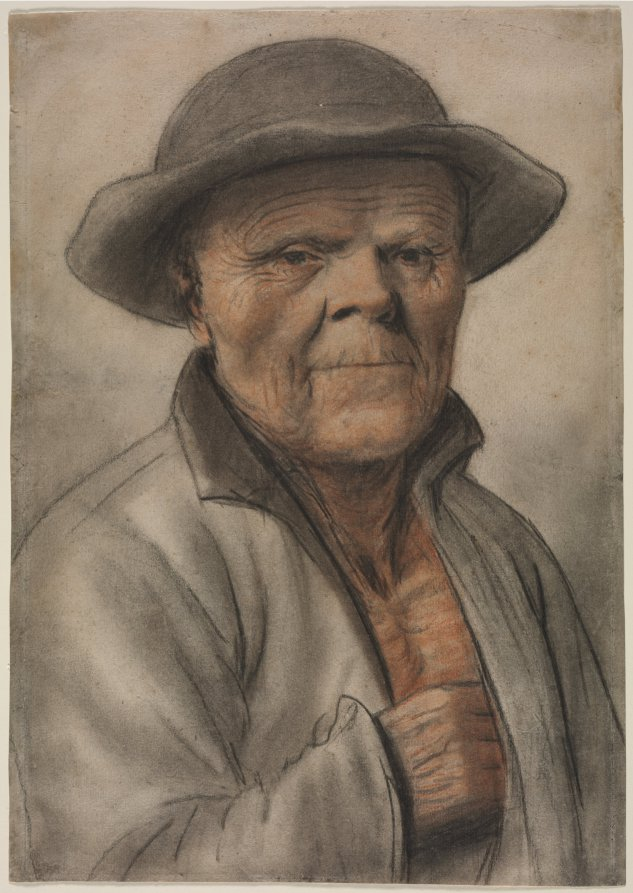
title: Portrait of an Old Man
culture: France, 17th century (?)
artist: manner of Nicolas Lagneau (French, 1590–1666)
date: 1600s?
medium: Black, red and brown chalk, with stumping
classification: Drawing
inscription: verso, upper right, in graphite: 23 18 1/4 00 ; lower center, in graphite: (16)